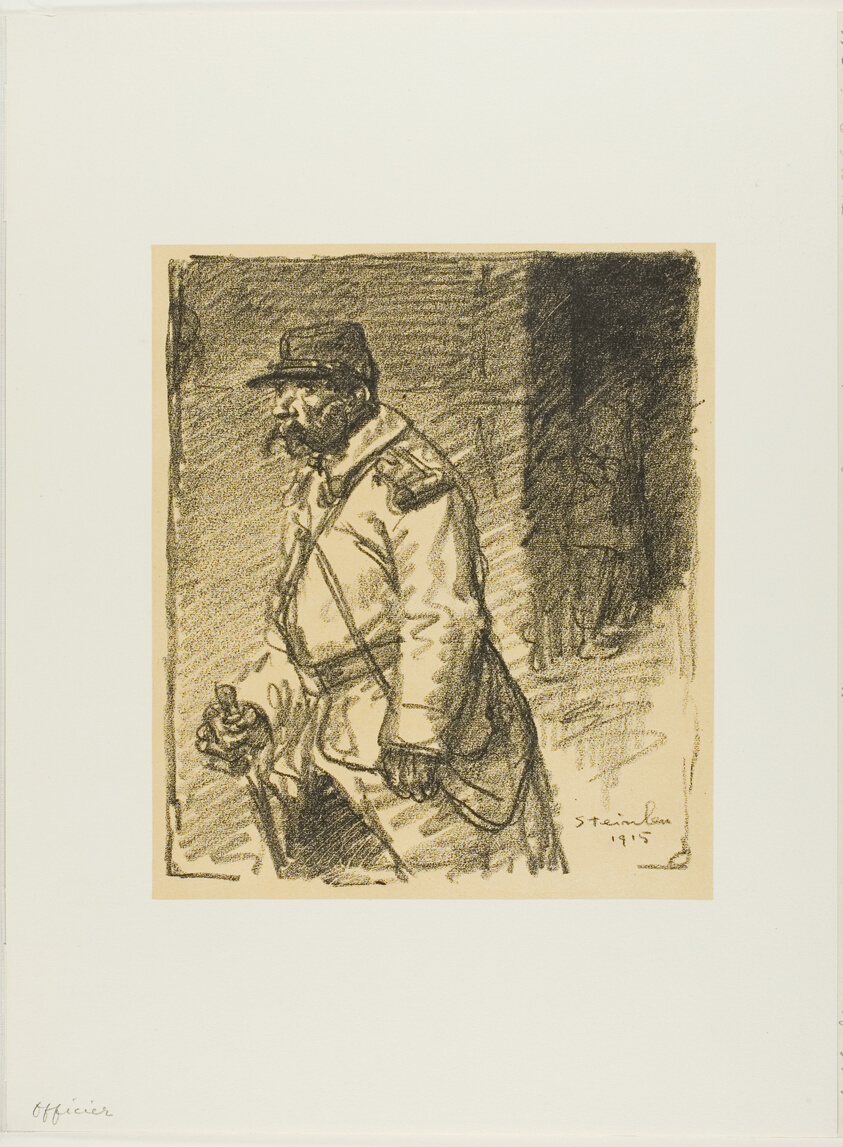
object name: Print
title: Errants...!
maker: Théophile-Alexandre Steinlen; French, born Switzerland, 1859-1923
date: 1915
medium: Lithograph in black over fawn tint on off-white wove paper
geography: France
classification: lithograph; print; prints and drawing